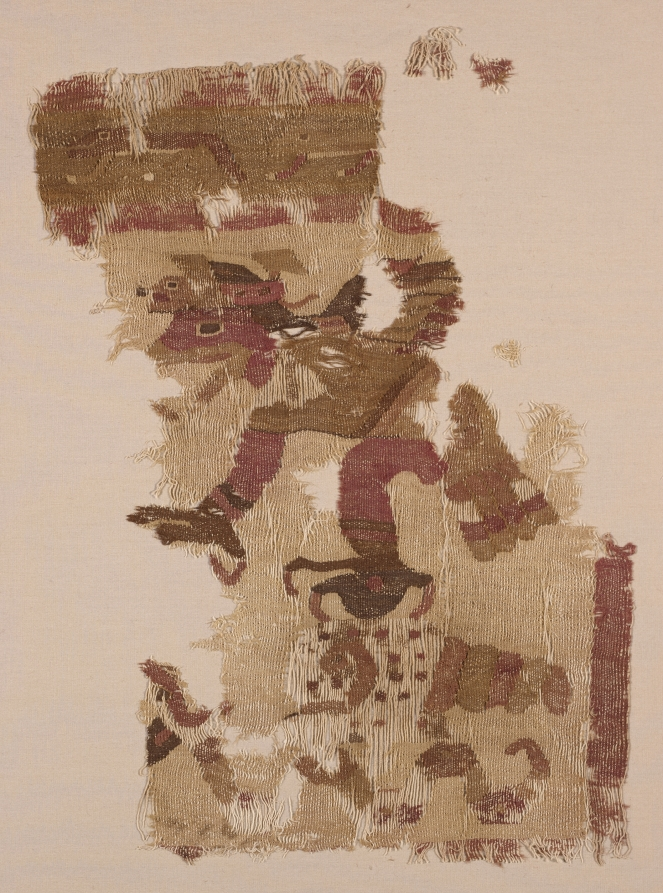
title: Textile Fragment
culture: Peru, Moche, north coast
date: c. 50–650 CE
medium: cotton and camelid fiber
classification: Textile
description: This fragment, one of several in the collection, is a rare survivor of catastrophic rains that destroyed much of the Moche textile legacy and may have helped to bring about the decline of Moche culture. It depicts a serpent and a snail beneath a hovering raptorial bird—perhaps a snail kite, a type of hawk named after its favored food. The size of the motifs implies that the original textile was large; a mantle (a shawl-like garment) or a hanging are among the possibilities.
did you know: This fragment is a rare survivor of floods that destroyed much of the Moche textile record.